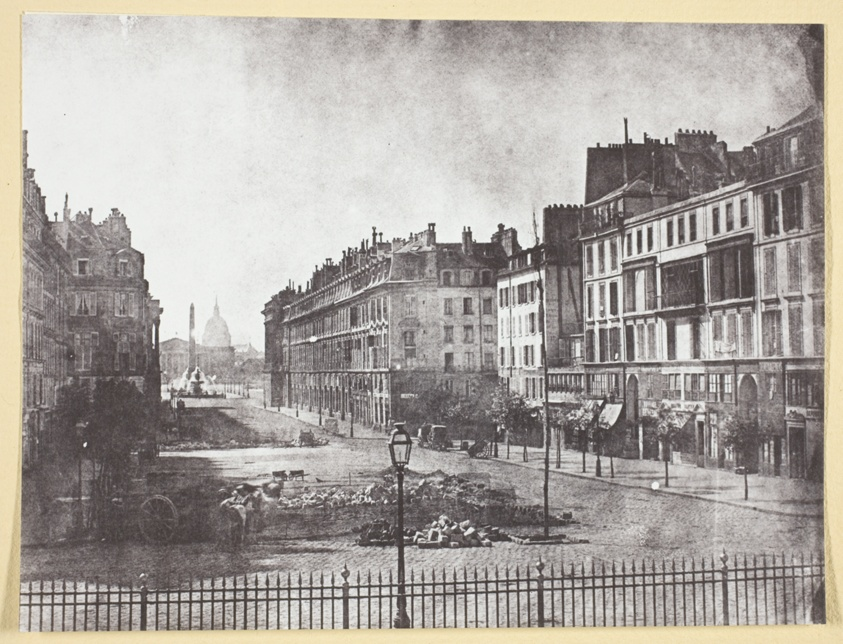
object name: Photograph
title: Rue Royale et Restes des Barricades de 1848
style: 19th century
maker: Hippolyte Bayard (French, 1801–1887)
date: 1848, printed 1965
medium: Gelatin silver print, No. 12 from the portfolio "Bayard: XXV Calotypes, 1842-1850" (1965)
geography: France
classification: photographic process; photography; photograph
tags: Collected by Hugh Edwards, Paris